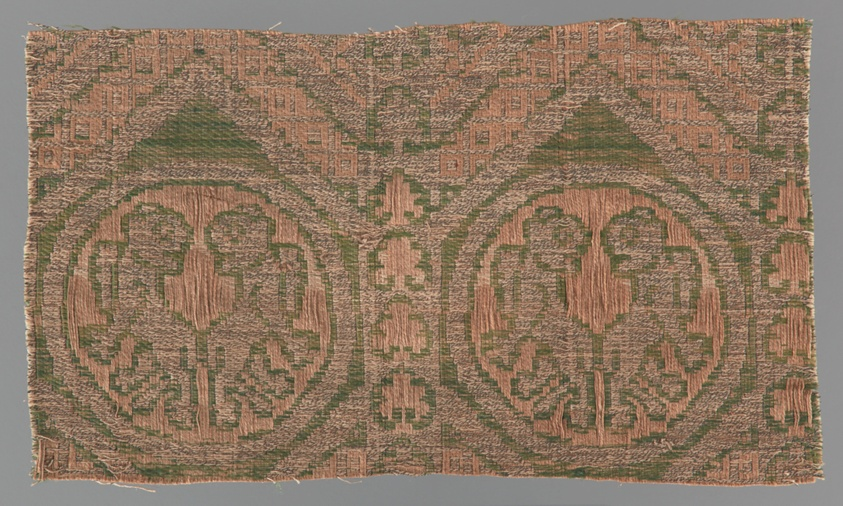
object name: Textile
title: Fragment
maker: Spain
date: 13th/14th century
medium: Silk, linen, and gilt-animal-substrate-wrapped linen, weft-faced three-color complementary weft twill weave with inner warps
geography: Spain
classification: textile; weaving